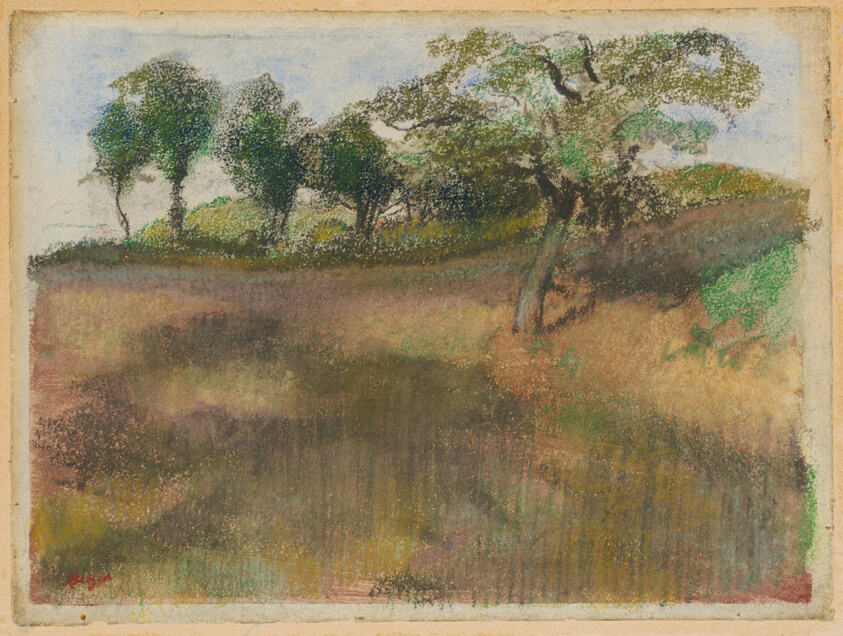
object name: Drawing and Watercolor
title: Ploughed Field Bordered by Trees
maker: Edgar Degas; French, 1834-1917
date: c. 1892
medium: Pastel, over color monotype, on off-white wove paper, laid down on cream card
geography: France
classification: prints and drawing; drawings (visual works); pastel; monotype; paper